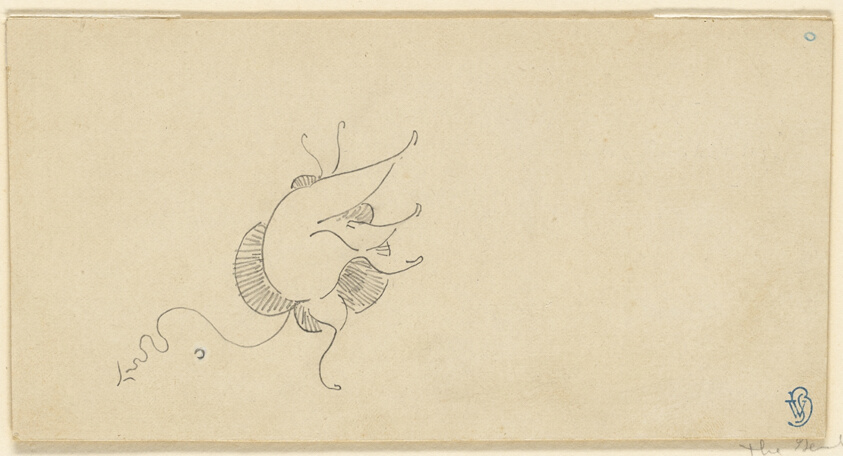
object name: Drawing and Watercolor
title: Butterfly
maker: James McNeill Whistler (American, 1834-1903)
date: c. 1890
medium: Graphite on cream board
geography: United States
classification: graphite; drawings (visual works); prints and drawing; paper